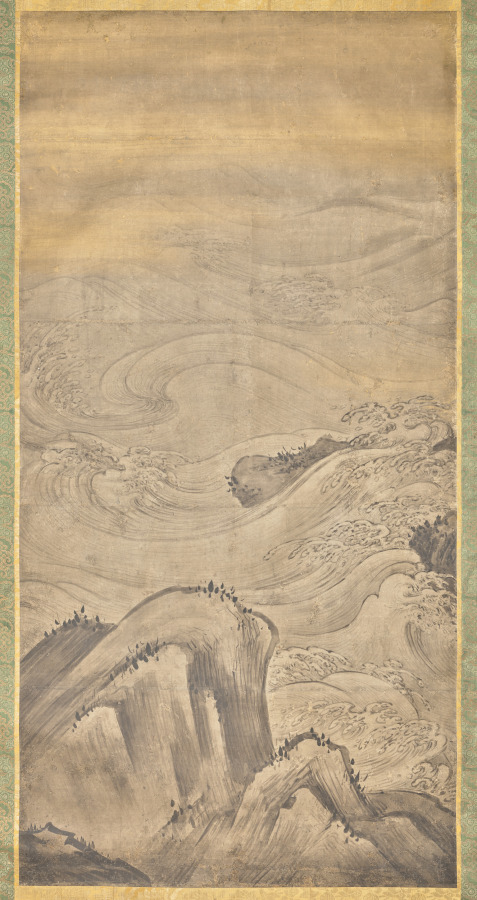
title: Rocks and Waves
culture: Japan, Muromachi period (1392–1573)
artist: attributed to Kano Motonobu (Japanese, c. 1476–1559)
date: early to mid-1500s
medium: sliding door fragment mounted as a hanging scroll; ink and gold wash on paper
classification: Painting